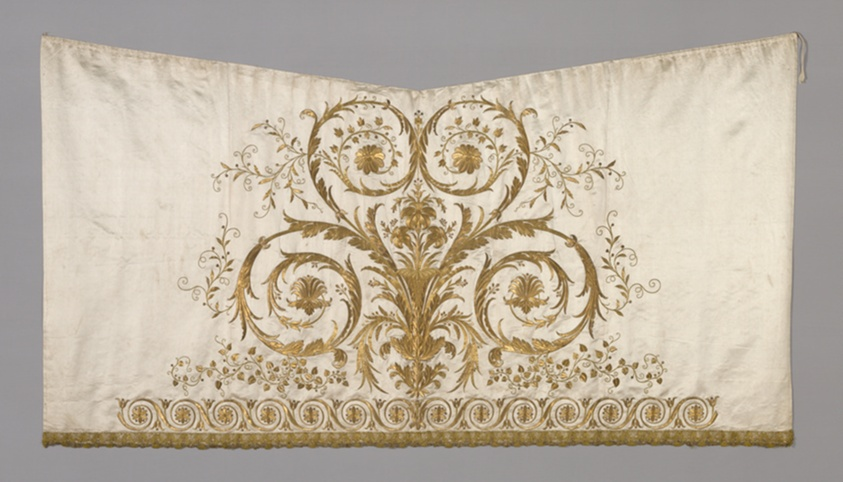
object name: Costume and Accessories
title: Skirt from a Court Gown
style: 19th century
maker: France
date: 1805-15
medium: Silk, satin weave; embroidered with gold metal-wrapped over a silk fibre core, gold frisé, silk, gold metal formed ornaments, "purl," spangles, gold metal strips; couching over paper core and silk padding, in pattern and backstitch; trimmed with bobbin lace made of gold metal strip wound around a silk fibre core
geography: France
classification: textile; needlework (visual works); costume; costume - embroidery; skirt (garment)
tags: lilies, flowers